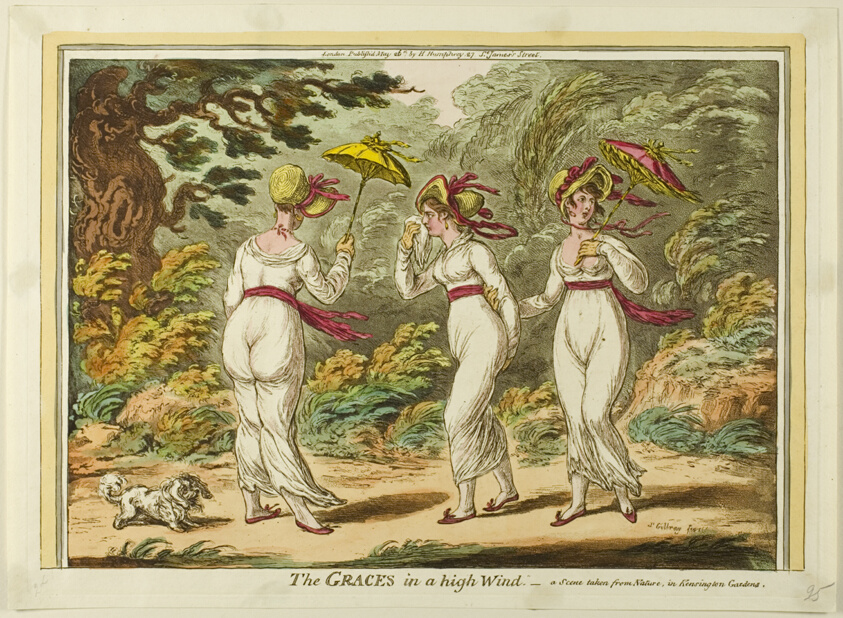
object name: Print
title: The Graces in a High Wind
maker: James Gillray (English, 1756-1815); published by Hannah Humphrey (English, c. 1745-1818)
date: published May 26, 1810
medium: Etching in black ink and watercolor on cream wove paper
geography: England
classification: etching; print; prints and drawing